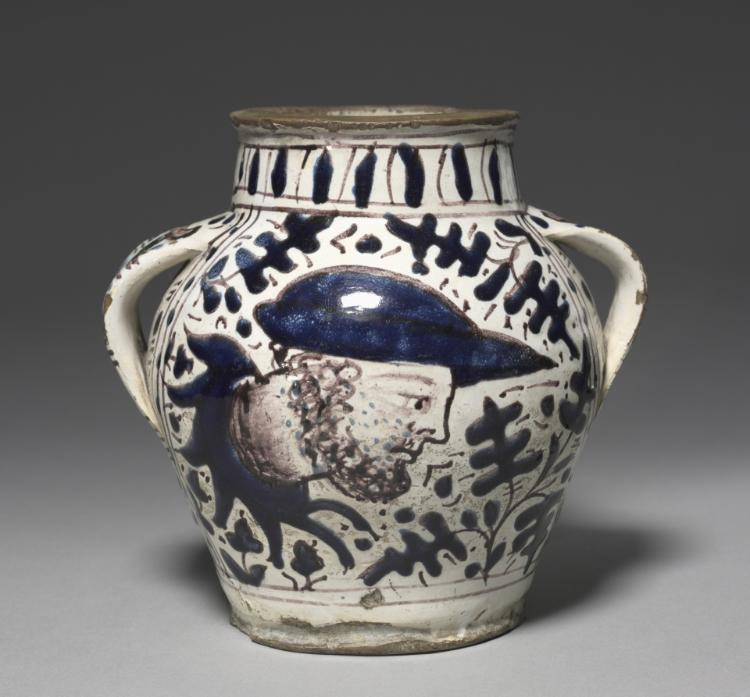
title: Two-Handled "Oak Leaf" Drug Jar with Male and Female Portraits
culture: Italy, Florence, 15th century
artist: workshop of Giunta di Tugio (Italian, c. 1382–1450)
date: 1431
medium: tin-glazed earthenware (maiolica)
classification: Ceramic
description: This two-handled drug container with a bulbous body and short neck belongs to a group of wares known as "oak leaf jars" because of their decoration. This example includes two profile busts amid blue-on-white oak leaves on branching stems. On each handle is a crutch, painted in green and manganese. This was the badge of the Hospital of Santa Maria Nuova in Florence. The star motif below the crutch is the workshop mark of the ceramist Giunta di Tugio, known to have received this commission in the year 1431. In the early Middle Ages hospitals were simple hospices set up outside cities to offer food and lodging to pilgrims and travelers. The Santa Maria Nuova hospital, by the mid-1300s the largest in Florence, was the first hospital in that city dedicated primarily to caring for the sick.